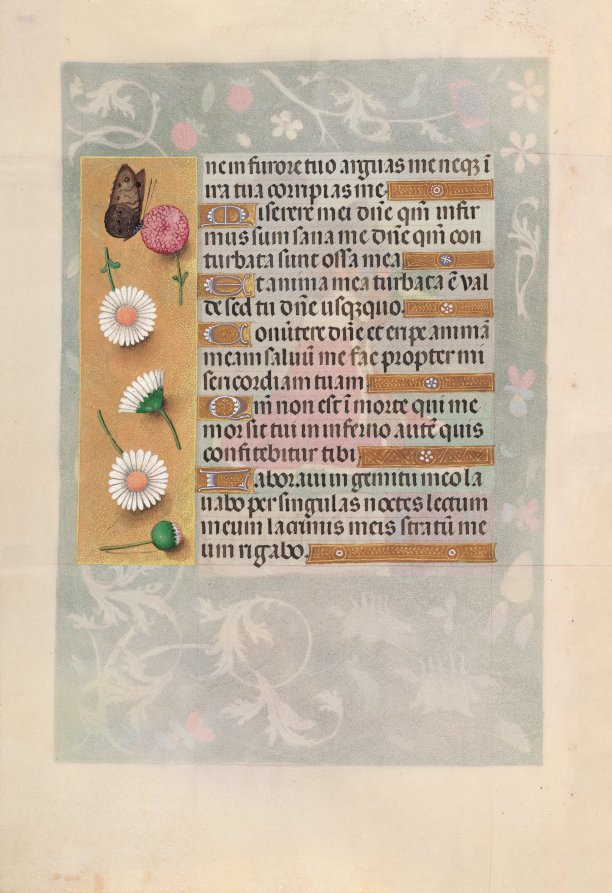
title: Hours of Queen Isabella the Catholic, Queen of Spain: Fol. 200v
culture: Flanders, Ghent and Bruges, late 15th century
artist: Master of the First Prayerbook of Maximillian (Flemish, c. 1444–1519)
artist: and Associates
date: c. 1500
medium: ink, tempera, and gold on vellum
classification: Bound Volume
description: This manuscript was illuminated by a circle of at least five highly organized manuscript painters active in the Flemish cities of Ghent and Bruges. The principal illuminator was Alexander Bening, who painted the majority of the book's miniatures. Manuscripts produced by this circle of artists are renowned for the decoration of their borders, which typically feature a rich variety of realistically-painted flowers, birds, and butterflies. This prayer book, called a book of hours, was intended not for a cleric, but for the private devotions of a lay person-in this case, Isabella the Catholic, Queen of Spain (1451-1504). Isabella's coat of arms embellishes the book's frontispiece. It is unlikely that the book was commissioned by the Queen herself; rather, she probably received it as a diplomatic gift from someone courting her patronage, perhaps Cardinal Francisco Jimenez de Cisneros. A Franciscan friar, Jimenez was dependent upon Isabella for his advancement, first to the post of Queen's confessor in 1492, and then to Archbishop of Toledo in 1495.